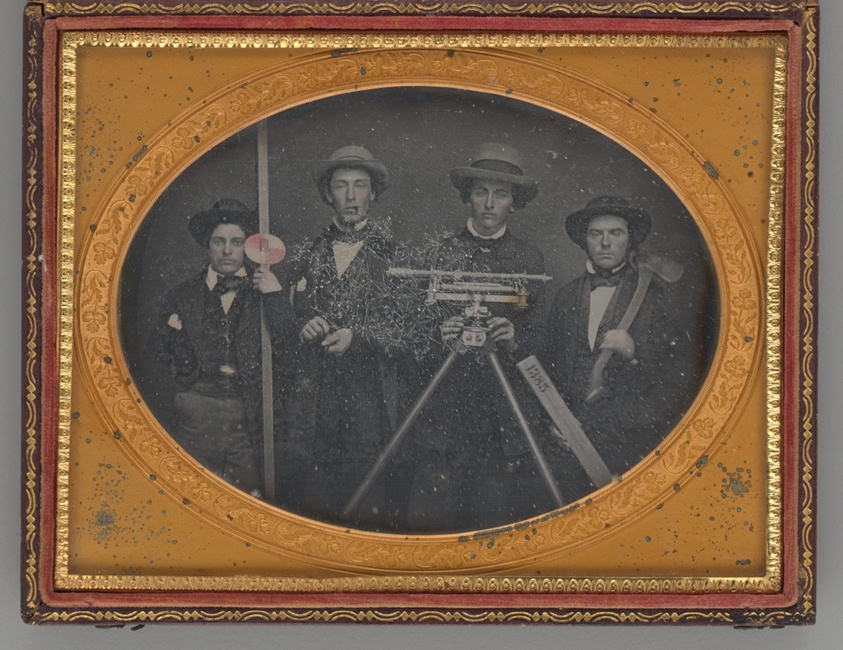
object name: Photograph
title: Untitled (Group Portrait of Surveyors)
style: 19th century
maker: McDonell & Co.; American, 19th century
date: 1855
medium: Daguerreotype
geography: United States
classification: portrait; daguerreotype; portrait; photograph; photographic process; photography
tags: lundberg collection, Male, portraits, portraits: male subject, portraits: multiple subjects